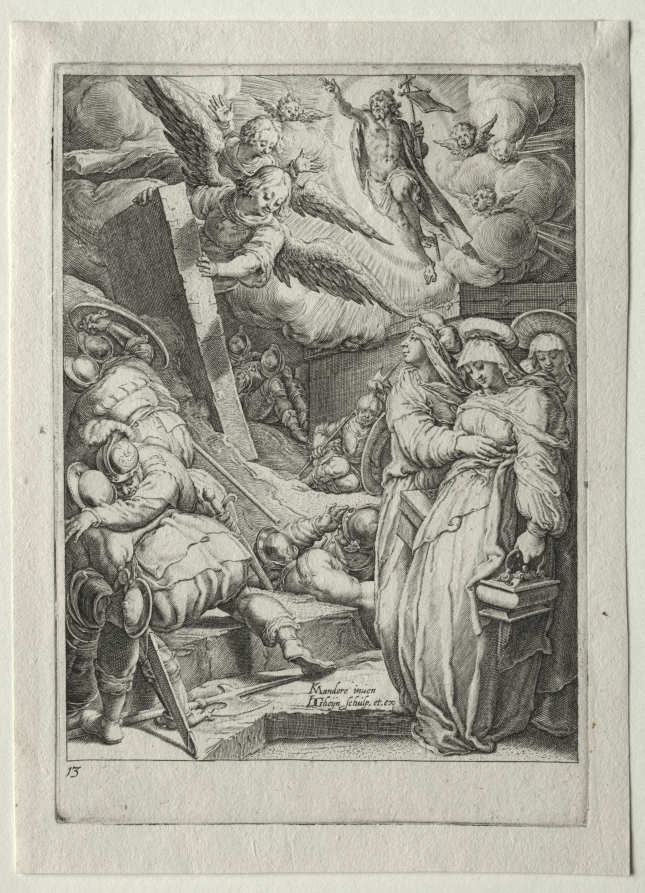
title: Passion Set: The Resurrection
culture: Netherlands, 16th century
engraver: Jacob de Gheyn II (Netherlandish, 1565–1629)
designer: after Karel van Mander I (Dutch, 1548-1606)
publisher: Jacob de Gheyn II (Netherlandish, 1565–1629)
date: 1596–98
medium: engraving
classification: Print